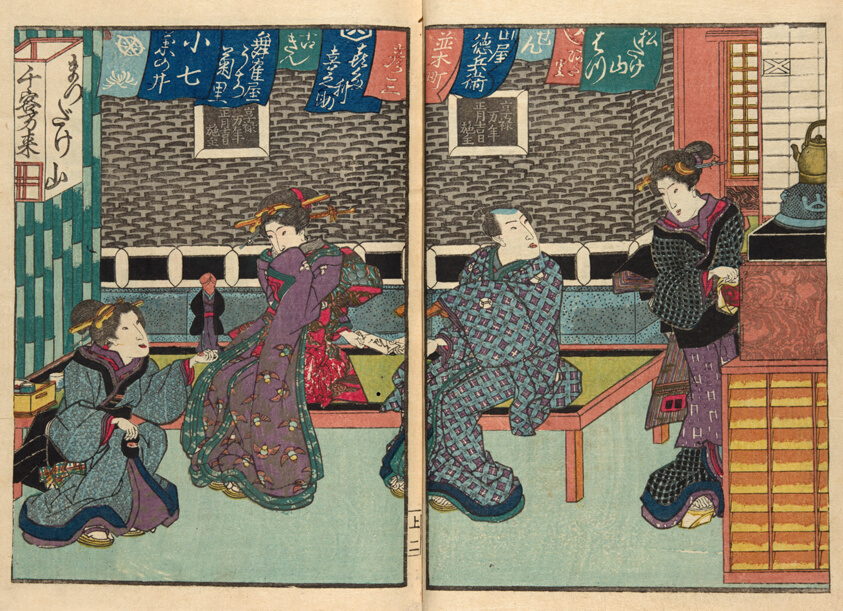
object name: Book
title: Shunjo gidan mizuage cho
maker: Kunisada Utagawa (Japanese, 1786-1864)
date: 1836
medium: Woodblock printed books, three volumes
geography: Japan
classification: book